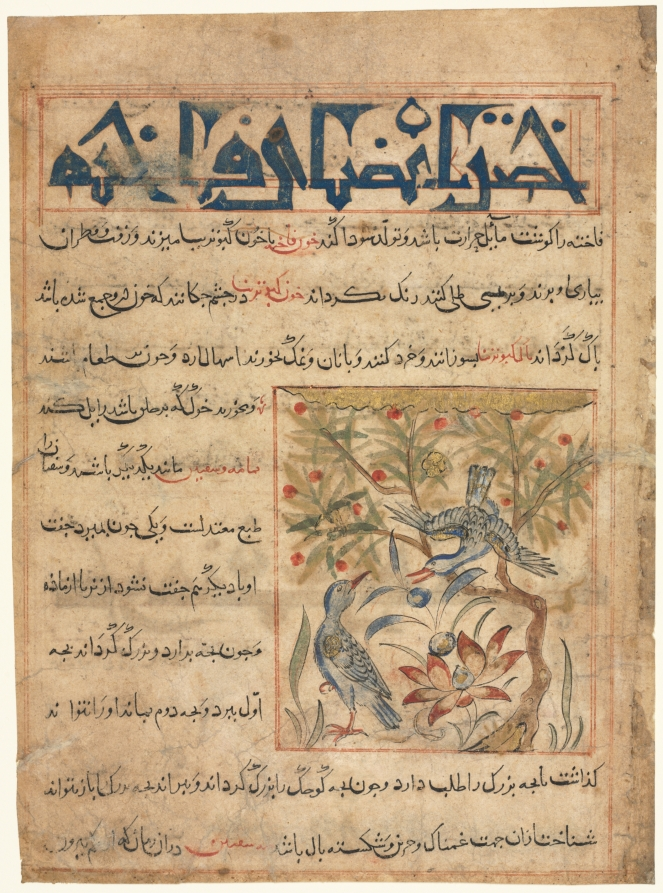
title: Folio from a Persian Manafi‘ al-Hayawan (The Benefits of Animals) of Abu Said Ubaid-Allah ibn Jibrail ibn Bakhtishu (died 1058–68) (recto)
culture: Iran, Maragah, Ilkhanid period (1256–1353)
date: c. 1300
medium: opaque watercolor, ink, and gold on paper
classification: Manuscript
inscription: script: Naskh (text), Kufi (heading)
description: This small illustration of ringdoves incorporates the influence of Chinese naturalism in the drawing of the tree trunk and lotus blossom. In contrast, the reverse side is more traditional. The innovative page layouts feature cursive nashki script with bold angular kufic script headings. Derived from Aristotelian sources, this treatise deals with the physical characteristics and organs of animals. The text was translated into Persian from Arabic for the Ilkhanid ruler Ghazan Khan (reigned 1295–1304). Roughly a dozen pages from this long-lost manuscript are known. It is dated by comparison with a similar manuscript made at Maragha, near Tabriz, in 1297 or 1299.